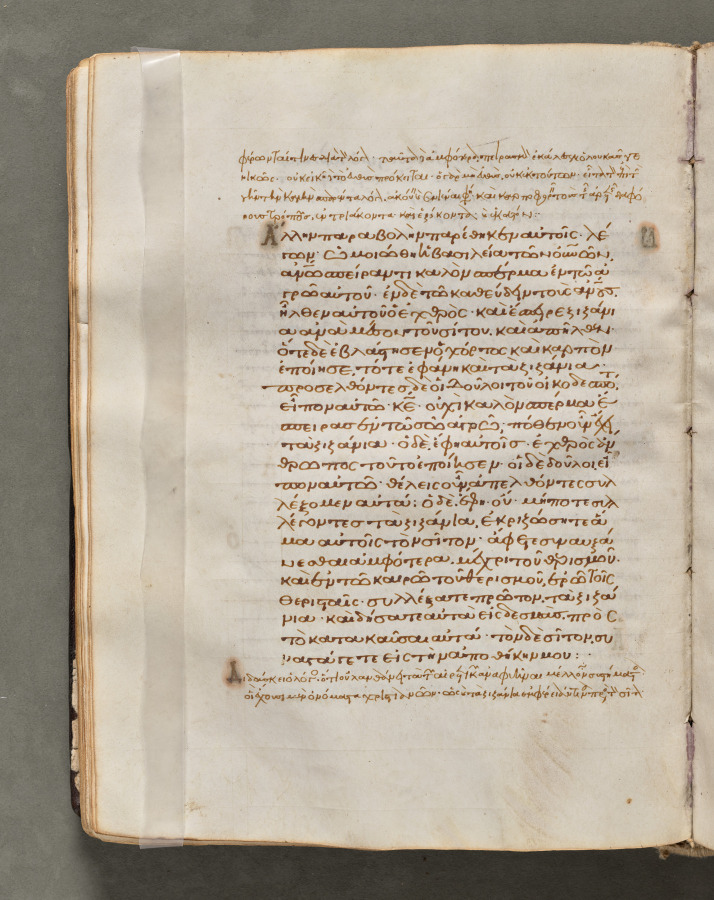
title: Text, folio 59 (verso), from a Gospel Book with Commentaries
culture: Byzantium, Constantinople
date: c. 1000–1100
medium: ink, tempera, and gold on vellum; leather binding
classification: Bound Volume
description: Each of the four gospels in this book opens on a page with brilliantly illuminated borders depicting the author of the text as well as birds-principally peacocks, symbols of the immortality of the soul-and fountains, representing the fountain of life and the salvation of the soul. This volume consists of 428 leaves with texts in Greek. Its level of sophistication suggests that it was probably written and decorated in a monastery in Constantinople.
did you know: Gospel Books were carried in procession through Byzantine churches.